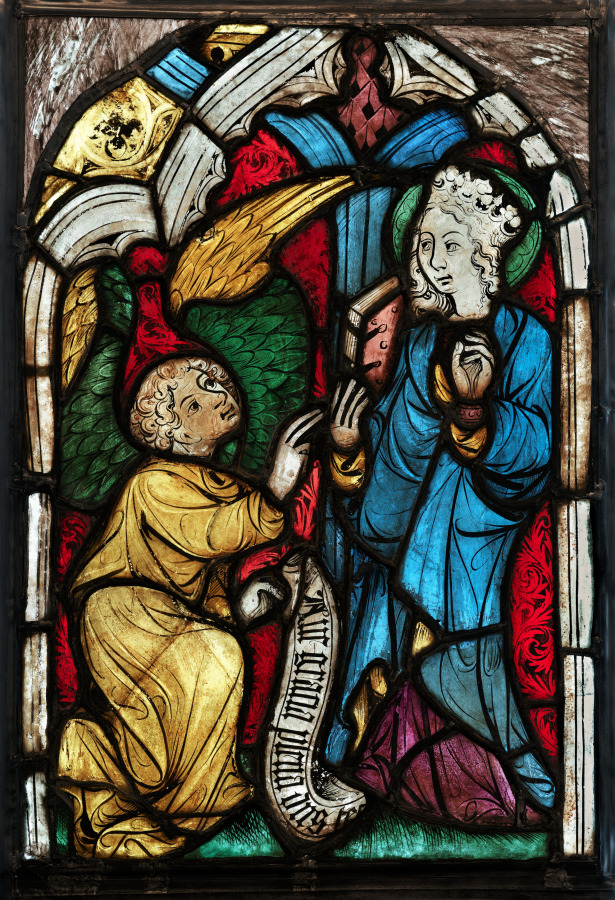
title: The Annunciation from the Parish Church of Maria am Waasen in Leoben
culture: Austria, Styria, 15th century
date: c. 1410–20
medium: stained glass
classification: Glass